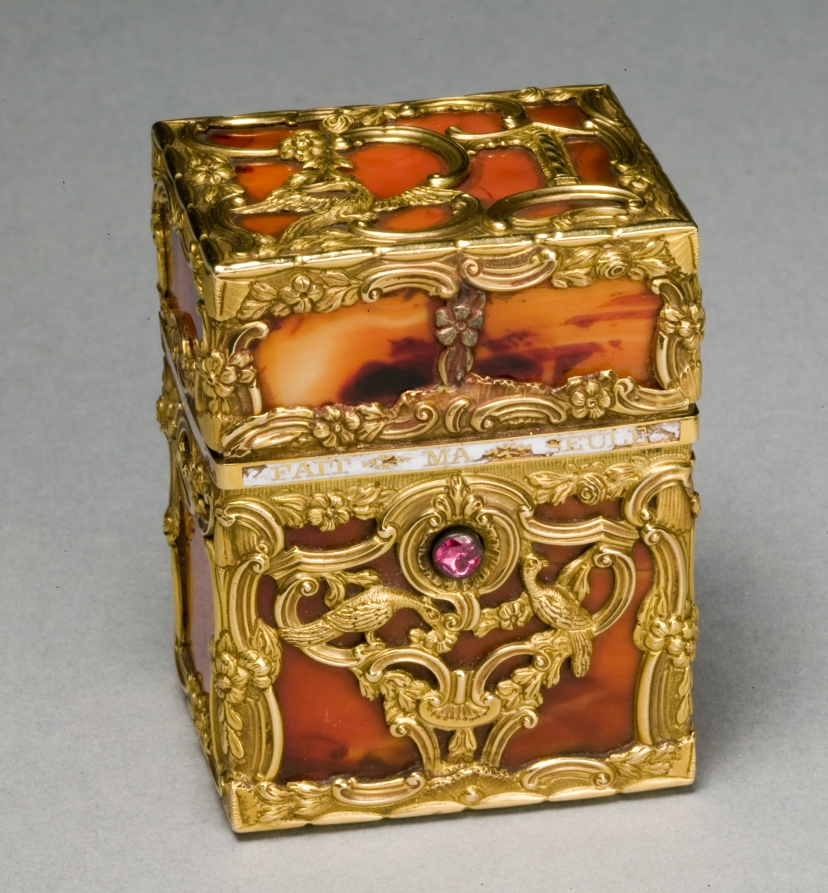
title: Vanity Case (Nécessaire)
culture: England, mid 18th century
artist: attributed to James Barbot (British)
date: c. 1760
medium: gold, orange agate, enamel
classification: Miscellaneous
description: Luxurious personal objects were an essential part of a privileged wardrobe during the 1700s and early 1800s, emphasizing their owner’s refinement and wealth. Jewelry, miniatures, and nécessaires—small expensive sets designed to hold grooming, writing, and sewing tools—were often given as intimate gifts, intended to be seen and admired. Their glittering surfaces, however, disguised a system based on the labor and suffering of enslaved or indentured people, whether in gold and stone mines or shops where these goods were made.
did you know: This small box with a mirror-lined lid is a dressing table accessory that contains luxury objects such a clasp knife, snuff spoon, ivory tablet, and scent bottles.